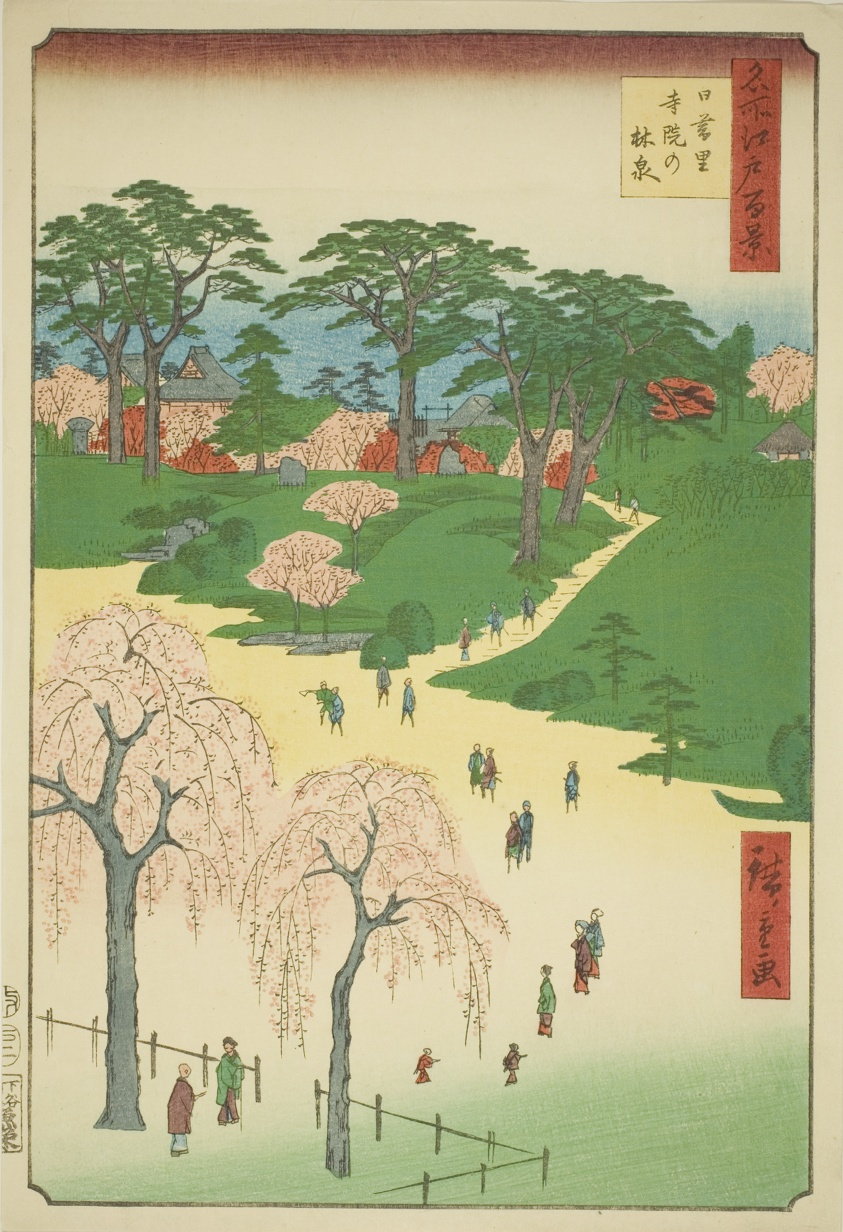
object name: Print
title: Temple Gardens in Nippori (Nippori jiin no rinsen), from the series "One Hundred Famous Views of Edo (Meisho Edo hyakkei)"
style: Japanese (culture or style)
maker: Utagawa Hiroshige 歌川 広重; Japanese, 1797-1858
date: 1857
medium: Color woodblock print; oban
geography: Japan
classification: woodblock print; print; asian art